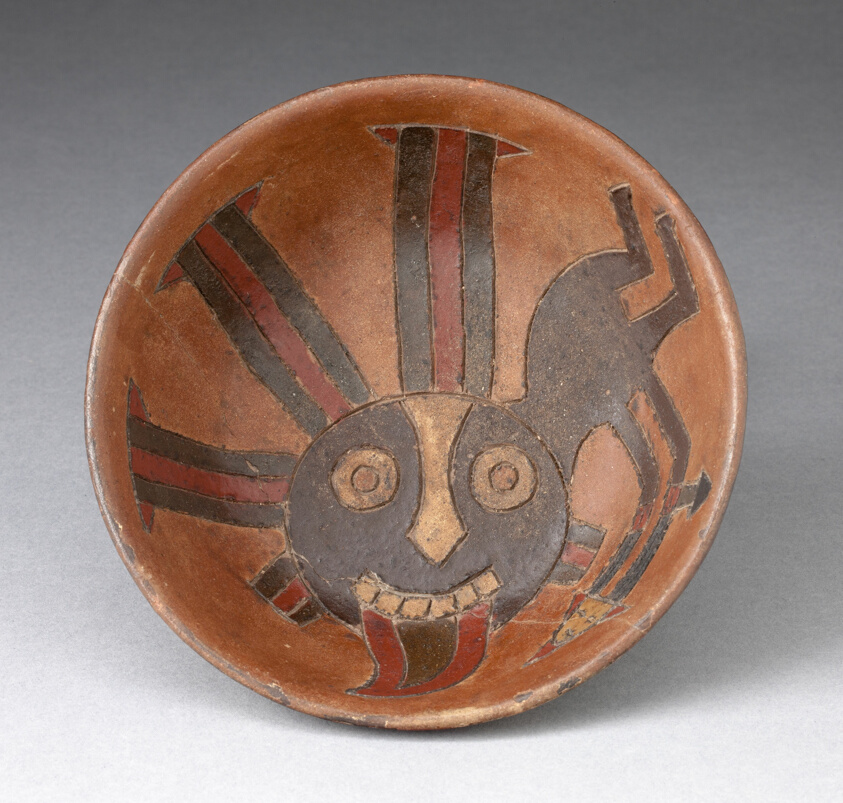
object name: Vessel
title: Bowl with Anthropomorphic Figure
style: paracas, early horizon, Pre-Columbian, americas, Arts of the Americas, andean, andes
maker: Paracas (South coast, Peru)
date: 650–150 BCE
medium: Ceramic and pigment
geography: Peru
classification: bowl; earthenware; art of the americas; ceramics; vessel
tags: super/natural